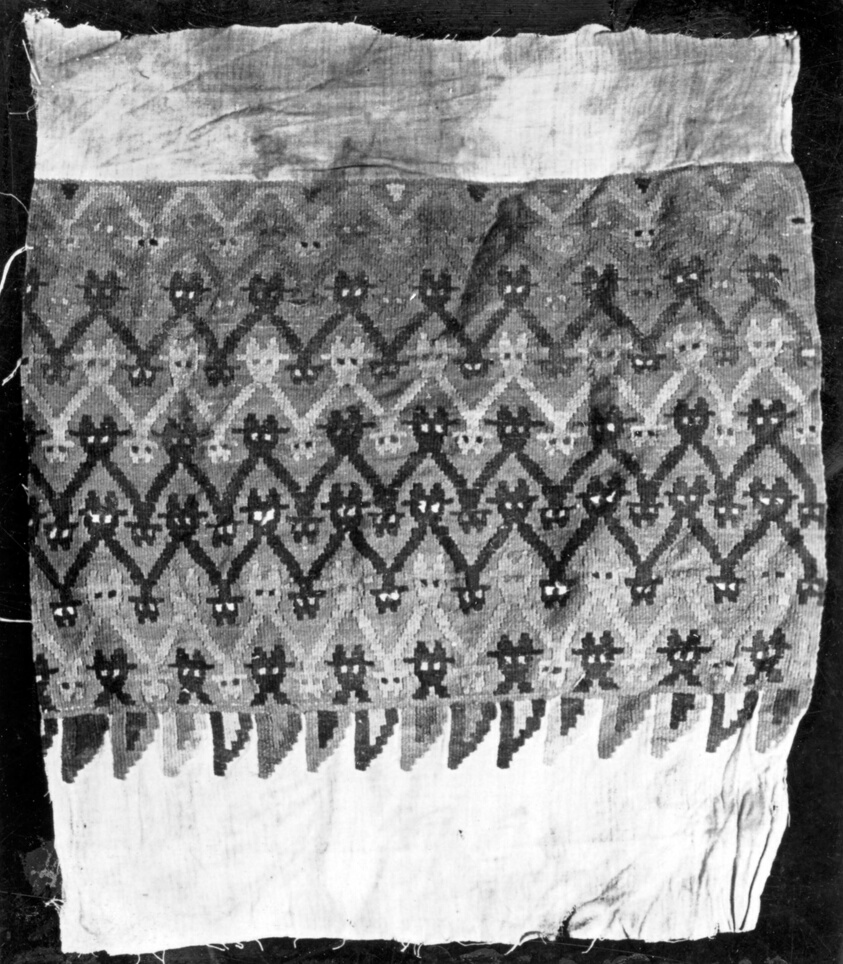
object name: Textile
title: Fragment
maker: Possibly south-central coast, Peru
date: A.D. 1000/1476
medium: Slit tapestry weave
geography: Peru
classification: textile; weaving